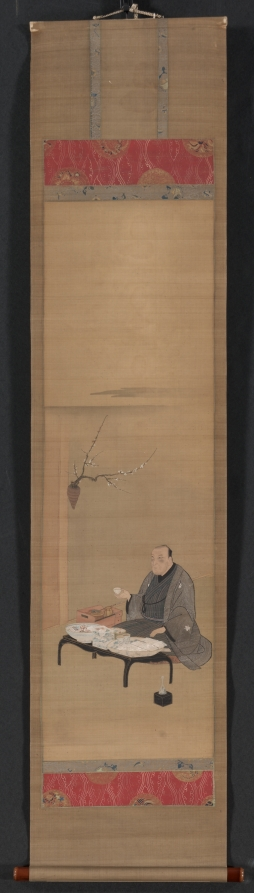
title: Portrait of Kinokuniya Bunzaemon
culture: Japan, Edo period (1615–1868)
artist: attributed to Utagawa Toyokuni (Japanese, 1769–1825)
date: early 1800s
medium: hanging scroll; ink and color on silk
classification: Painting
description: Kinokuniya Bunzaemon was one of Edo’s first millionaire merchants. He made his fortune selling lumber, a lucrative and expanding business in Edo that was often ravaged by fire. Well known for his extravagance, he entertained lavishly and was a generous patron of the theater. He was said once to have set gold and lacquer cups afloat on the Sumida River to amuse people downstream. This painting may be an imaginary portrait, as Kinokuniya Bunzaemon died in 1734—35 years before the artist Toyokuni was born. A patron of the entertainment district and a gourmand, Kinokuniya probably enjoys a New Year’s meal including sushi served on blue-and-white porcelain. The square, tiered box was typically used for serving food for the New Year.